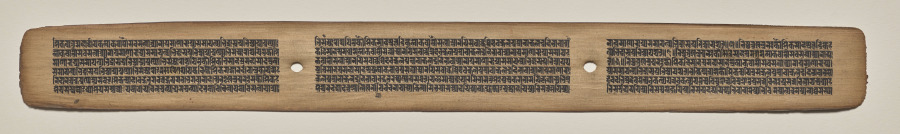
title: Text, Folio 39 (recto), from a Manuscript of the Perfection of Wisdom in Eight Thousand Lines (Ashtasahasrika Prajnaparamita-sutra)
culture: Eastern India, Bihar, Vikramashila Monastery. Painting: Nepal, Kathmandu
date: Sunday, September 14, 1119 (year 239 of the Newar Samvat in the month of Ashvina)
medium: gum tempera and ink on palm leaves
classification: Painting